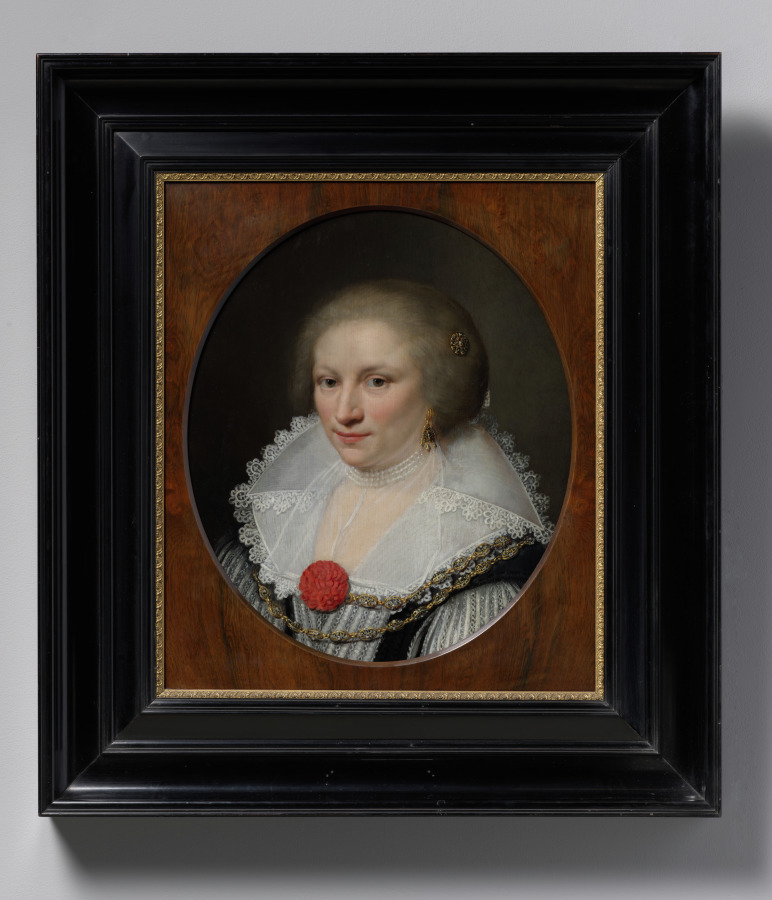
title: Portrait of a Woman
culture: Netherlands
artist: Jan Anthonisz. van Ravesteyn (Dutch, c. 1570–1657)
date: 1620s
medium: oil on wood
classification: Painting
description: How do you conserve a painting when portions are missing? The mid-treatment image (below) shows the painting after cleaning, when earlier restorations had been removed. In the painting on view, notice how the conservator reconstructed portions of the sitter’s lace collar and elaborate necklace. She re-created missing passages after studying the artist’s technique in other works and carefully emulating his treatment of the remaining lace and elements of the twisting, three-dimensional necklace. Conversely, there was not enough information to reconstruct what was probably another ornament at the back of the sitter’s head, so the decision was made not to speculate and invent something in that space.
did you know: The sitter wears several transparent and translucent white collars that become opaque when layered.